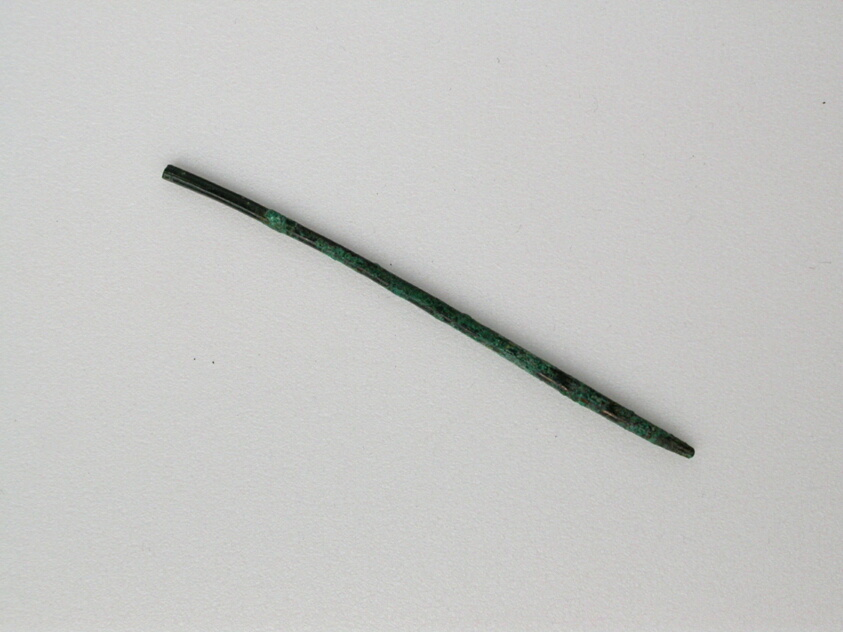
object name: Costume and Accessories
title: Pin Shank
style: geometric, ancient, greek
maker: Greek; Thessaly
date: Geometric Period (800–600 BCE)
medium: Bronze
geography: Thessalía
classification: votive offering; ex-voto; costume